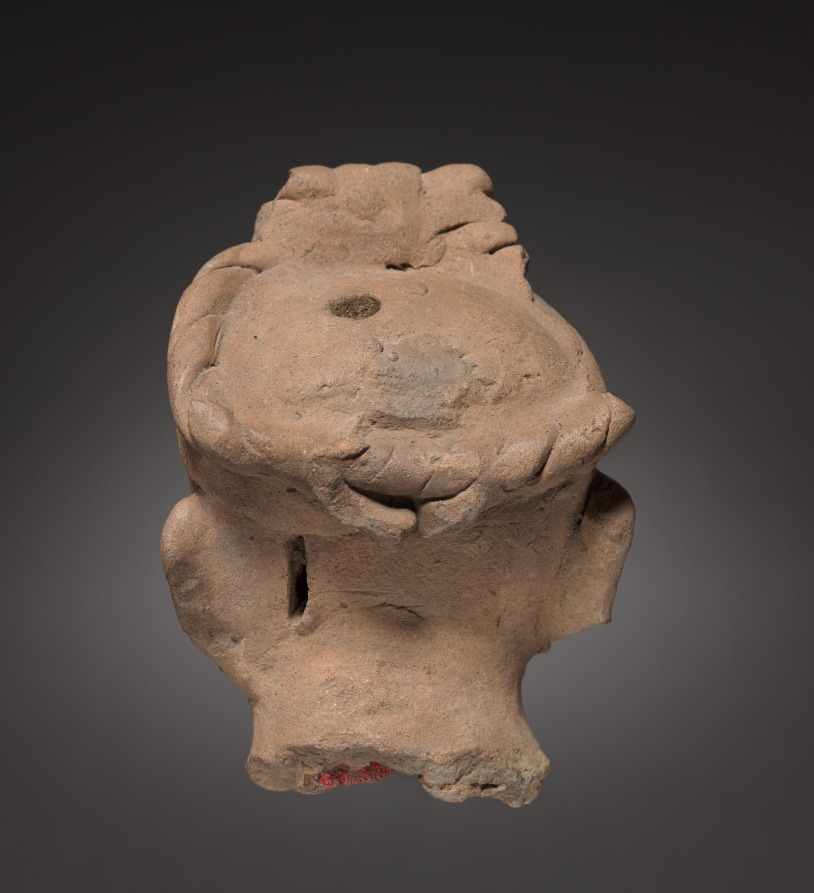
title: Head Fragment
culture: Mexico, Veracruz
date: 900–1200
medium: molded and modeled pottery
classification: Sculpture